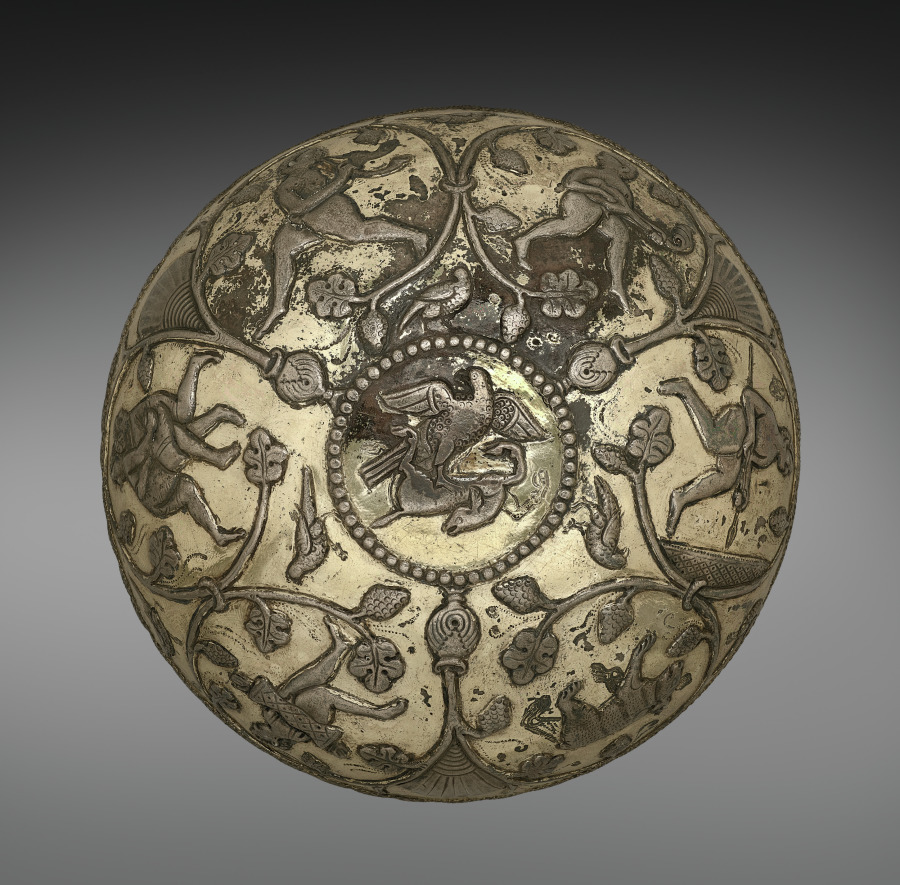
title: Bowl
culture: Iran, Sasanian Empire (224–651 CE)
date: 500–700 CE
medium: silver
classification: Metalwork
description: Every good Zoroastrian was supposed to spend one-third of his day farming; one-third philosophizing; and one-third eating, resting, and at pleasure. The abundance of Sasanian luxury goods is evidence of the importance accorded the last third of the day.